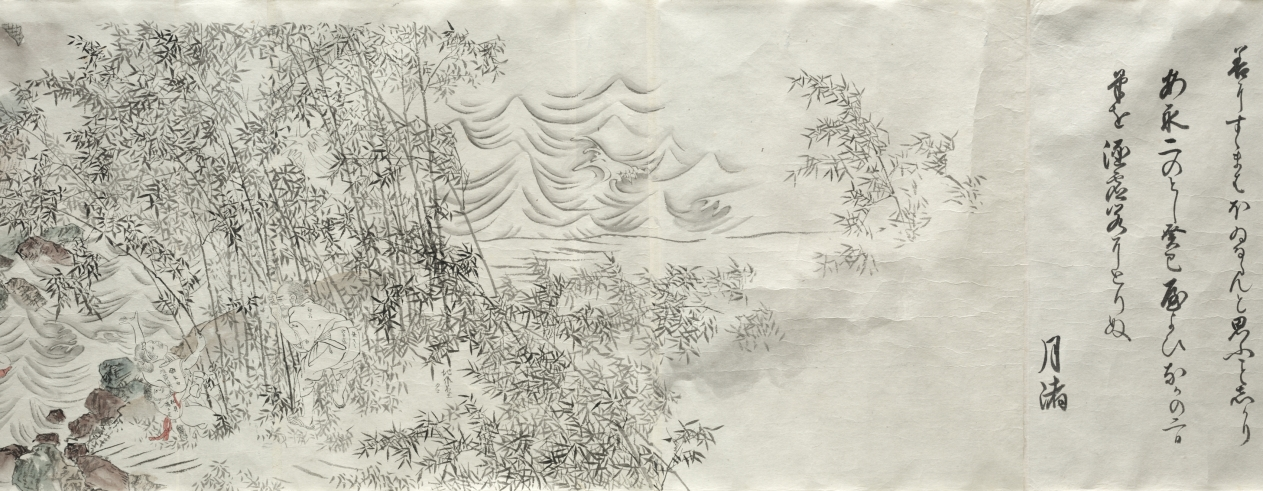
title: Sketch Copy of Natural Disasters, from the Seven Fortunes and Misfortunes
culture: Japan, Edo period (1615–1868) to Meiji period (1868–1912)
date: after 1773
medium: handscroll; ink and color on paper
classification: Painting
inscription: Signed: Gettcho; dated 1773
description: This unmounted handscroll is a copy of the first of a three-scroll set painted by Maruyama Ōkyo (1733–1795) for Buddhist monk Yujō (1723–1773). It depicts people's unfortunate encounters with forces of nature from wind to beasts. Ōkyo's realistic, contemporary imagery was meant to evoke a sense of recognition and empathy in viewers, shocking them into avoidance of possible punishments.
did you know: Notations that appear throughout the scroll indicate colors and other details of the original painting.